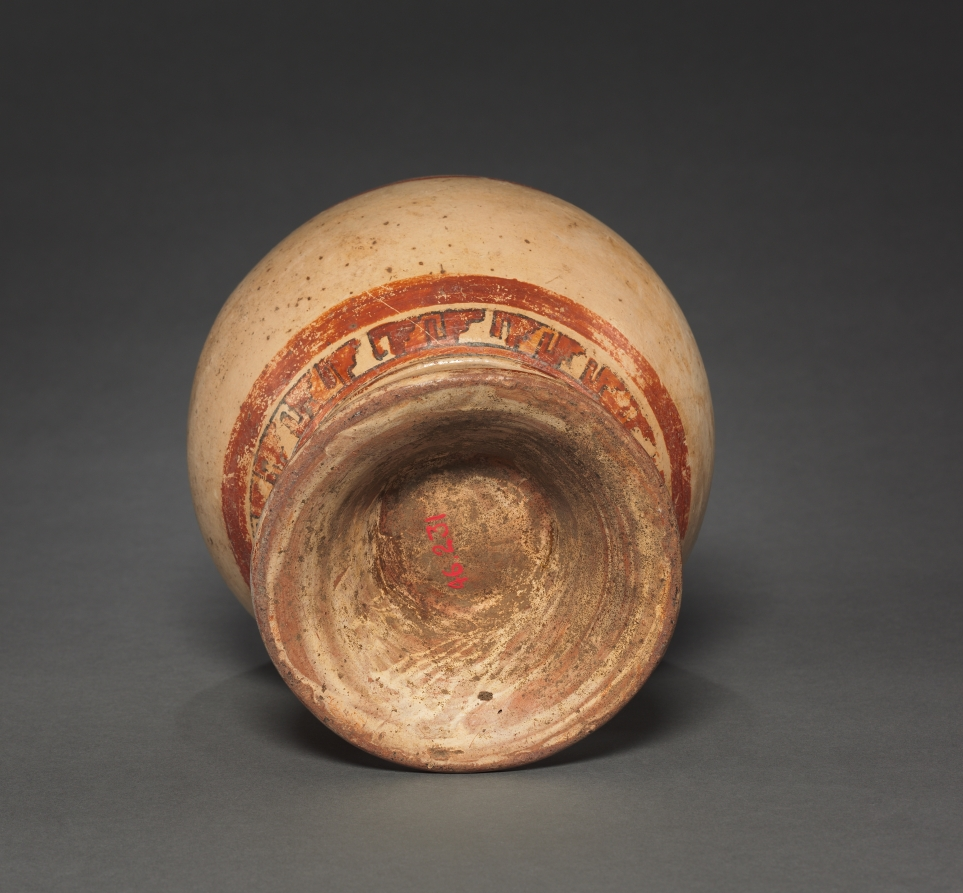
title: Vase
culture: Costa Rica, Filadelphia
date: 1000–1550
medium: earthenware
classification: Ceramic